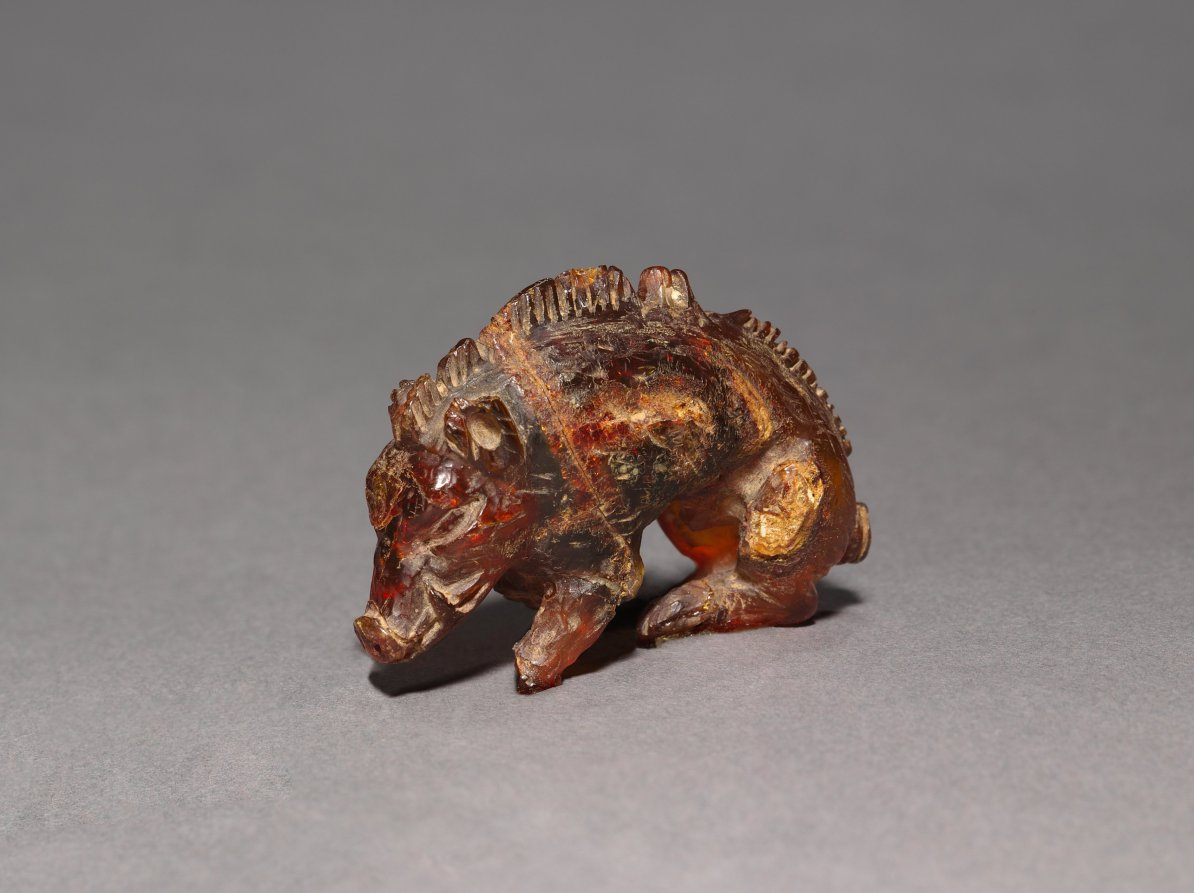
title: Pendant in the Form of a Boar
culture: Etruscan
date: 400s BCE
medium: amber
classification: Jewelry